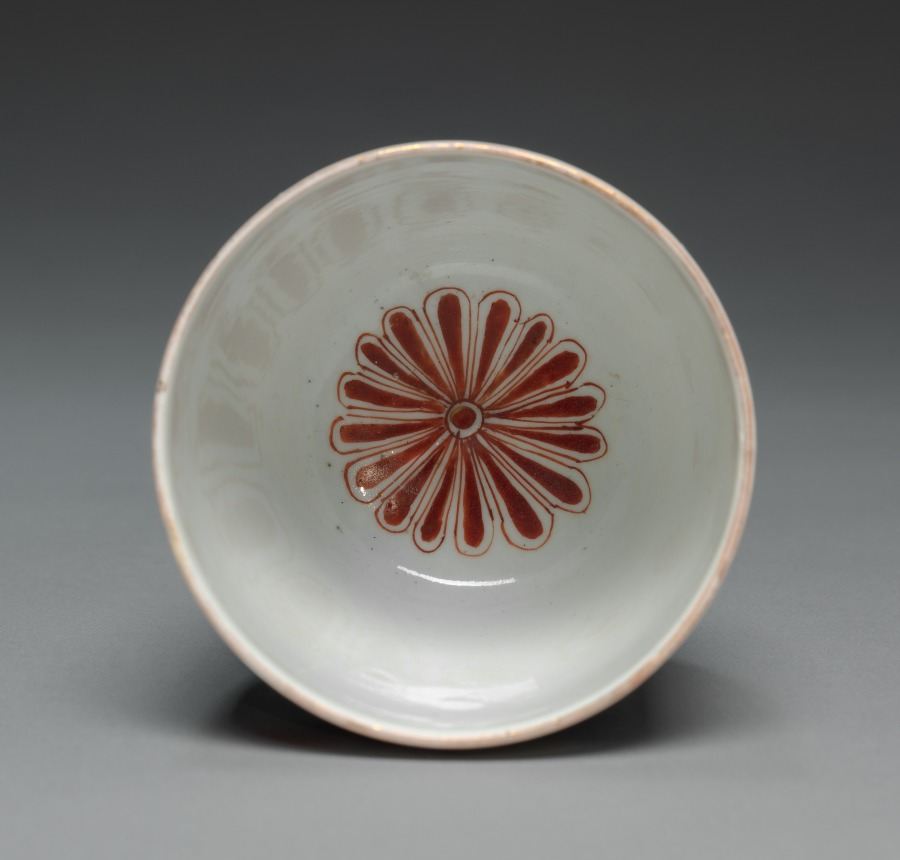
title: Goblet with Flowers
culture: Japan, Edo period (1615–1868)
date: c. 1700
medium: porcelain with overglaze color enamel and gold (Hizen ware Ko-Imari style)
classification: Ceramic